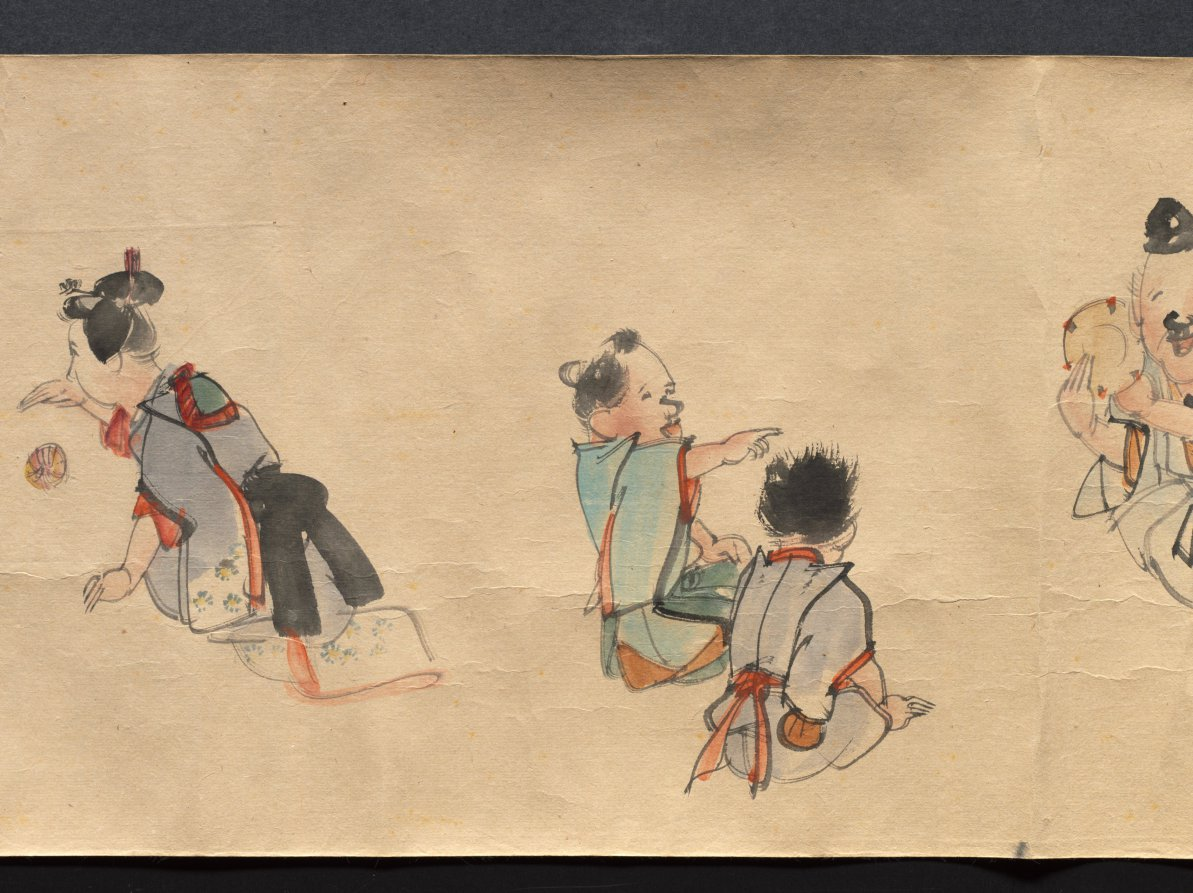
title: Festival Scenes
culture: Japan, Edo period (1615–1868)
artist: Suzuki Nanrei (Japanese, 1775–1844)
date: c. 1795–1844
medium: handscroll; ink and color on paper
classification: Painting